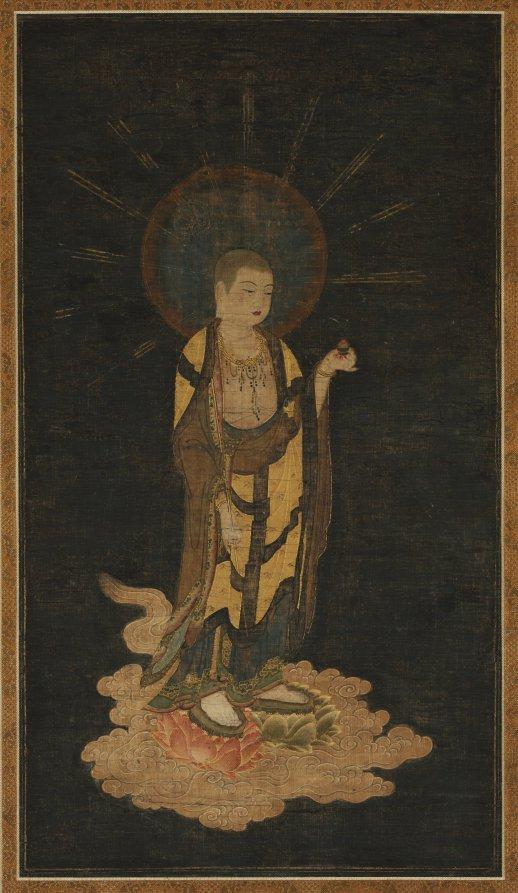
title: Welcoming Descent of Jizō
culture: Japan, Kamakura period (1185–1333)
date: 1200s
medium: Hanging scroll; ink, color, gold, and cut gold on silk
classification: Painting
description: The bodhisattva Jizō—an enlightened being who refuses to become a Buddha in order to aid other beings in their quest for enlightenment—appears as a Buddhist monk carrying a wish-fulfilling jewel and a golden staff topped with rings. He descends with each of his feet balanced atop a lotus, borne by clouds to save a suffering believer who has called out for his help. Jizō is well known among Buddhists for rescuing people from the many Buddhist hells.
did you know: Jizō is well known for rescuing people from the many Buddhist hells.